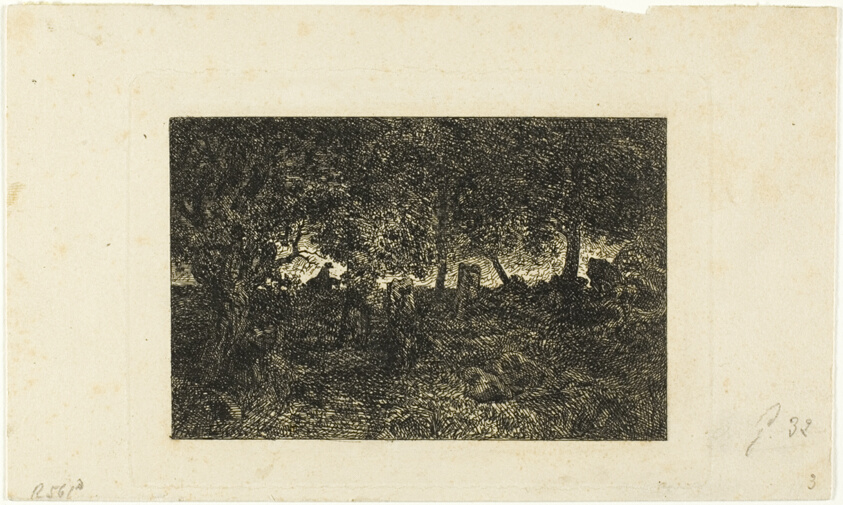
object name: Print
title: In the Forest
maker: Charles Émile Jacque (French, 1813-1894); after Théodore Rousseau (French, 1812-1867)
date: 1844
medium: Etching on cream wove paper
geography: France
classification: etching; print; prints and drawing